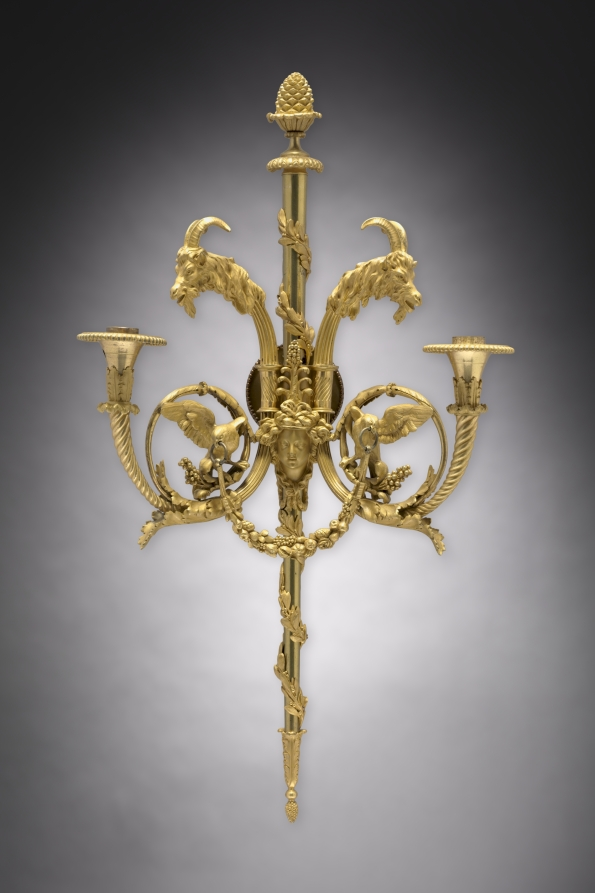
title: Candle Bracket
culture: France, style of Louis XVI, 18th Century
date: c. 1780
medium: gilt bronze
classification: Furniture and woodwork